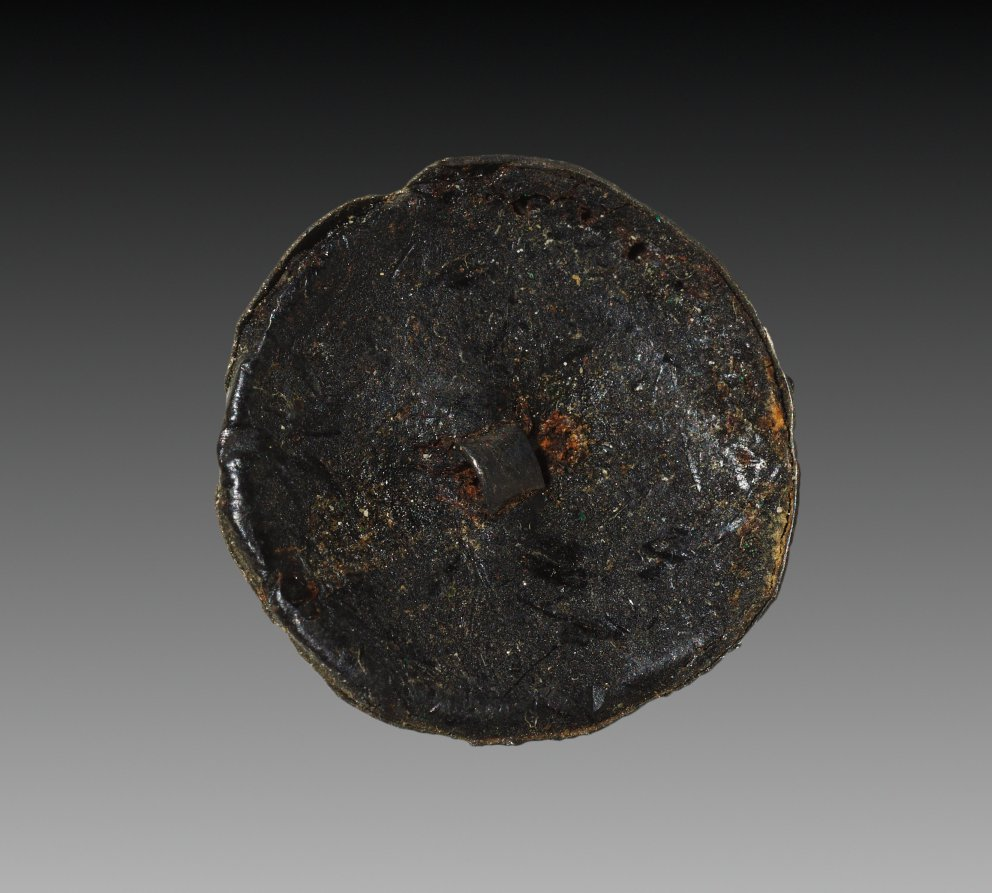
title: Rosettes for Wig Decoration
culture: Egypt, Middle Kingdom (2040–1648 BCE), Dynasty 12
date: 1980–1801 BCE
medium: silver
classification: Jewelry